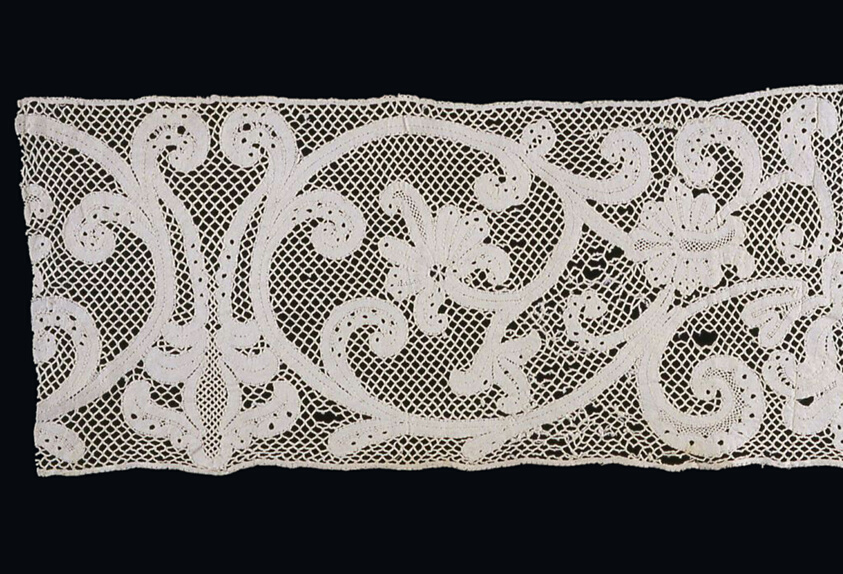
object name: Textile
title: Fragment (Insertion)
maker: Italy, possibly Milan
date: 1701/50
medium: Linen, bobbin part lace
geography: Italy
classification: textile; lace - bobbin